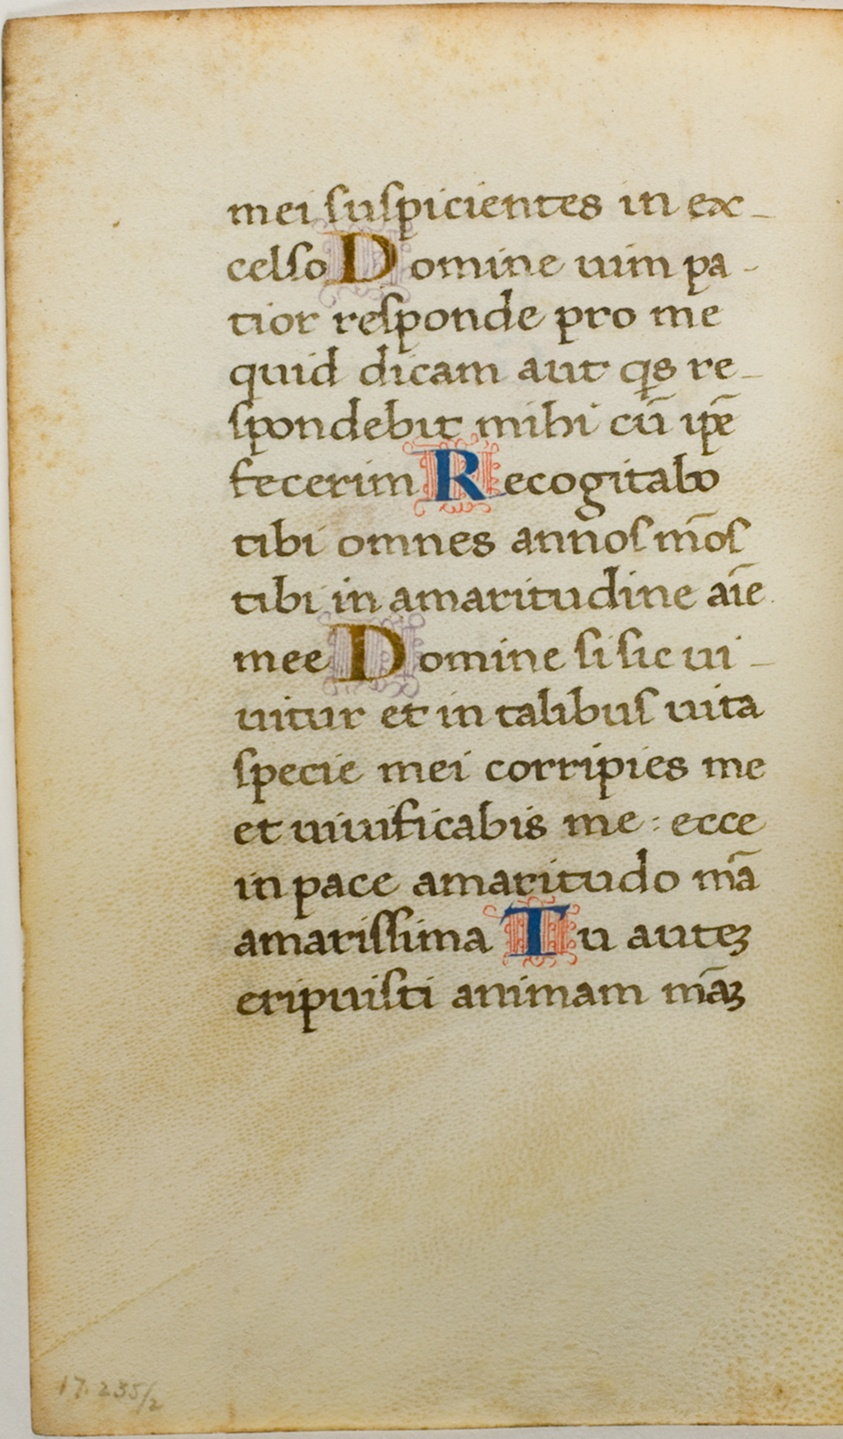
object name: Drawing and Watercolor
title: Illuminated Manuscript Leaf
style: medieval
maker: Italian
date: c. 1450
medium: Manuscript cutting with roman small letter inscriptions in black and dark brown inks, tempera and gold leaf illuminated letters, and decorations in red and lavender inks, on vellum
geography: Italy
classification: pen and ink drawings; manuscript; drawings (visual works); prints and drawing